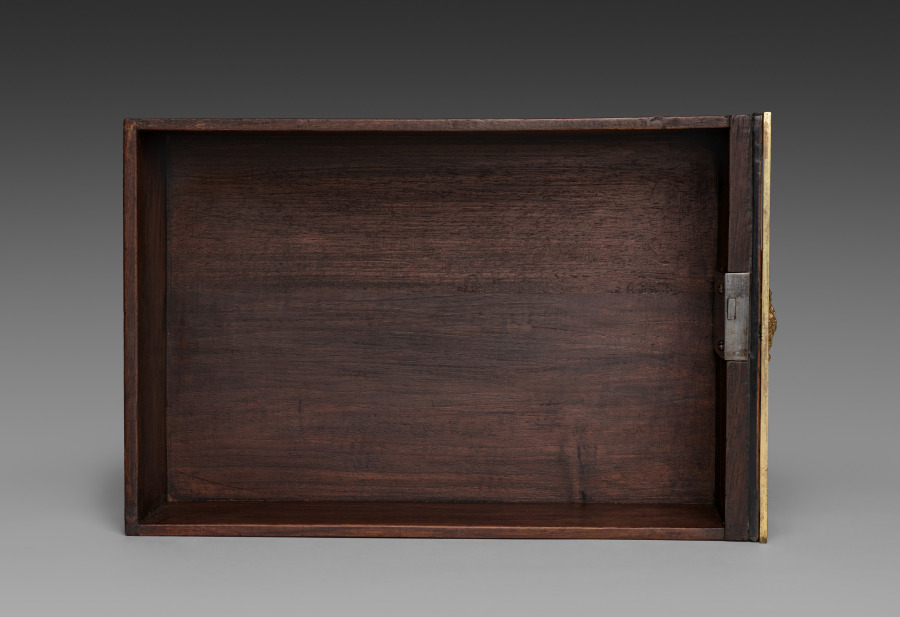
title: Side Drawer for Cabinet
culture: France, late 17th Century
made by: André-Charles Boulle (French, 1642–1732)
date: c. 1690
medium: ebony, marquetry in metal and tortoise shell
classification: Furniture and woodwork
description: Appointed cabinetmaker to King Louis XIV in 1672, André-Charles Boulle became a master of furniture making in France during the late 1600s until his death in 1732. Known primarily for his use of marquetry, in which metal patterns are inlaid into tortoiseshell then applied within the veneered surface of the furniture, Boulle established a level of quality and craftsmanship few others could achieve. As a result, his work found favor at the royal court and among other aristocrats and diplomats eager to impress the king. The inclusion of a medallion depicting Louis XIV within the bronze decoration of this chest would have identified the owner with the royal court. Often exhibiting stout architectural proportions with elegant groups of inlaid motifs such as the parrot on the central panel of this chest, Boulle’s designs are an example of the intellectual fashion for contrasting ideas, materials, and motifs.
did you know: Originally designed to sit atop an elaborate tall stand, this chest was likely altered in the late 1700s to reduce its scale and height.